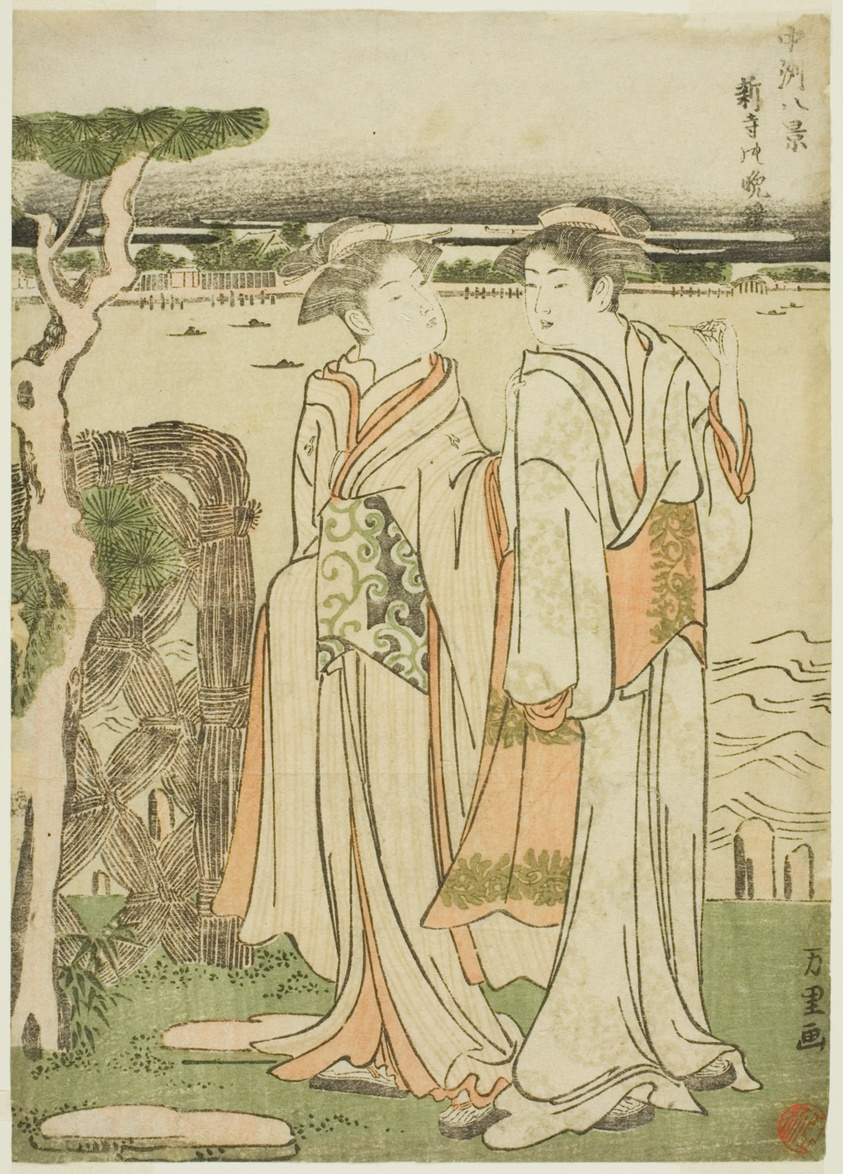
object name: Print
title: Evening bell at Mii Temple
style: Japanese (culture or style)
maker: Katsushika Hokusai 葛飾 北斎; Japanese, 1760-1849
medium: Color woodblock print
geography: Japan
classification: woodblock print; print; asian art